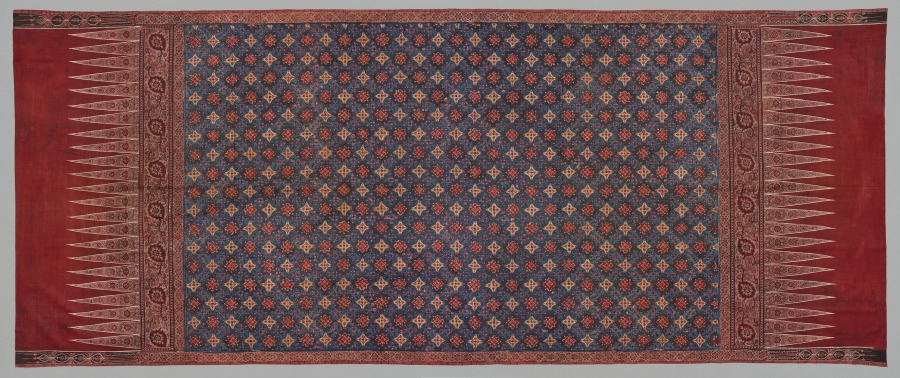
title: Hip Wrapper (tapis)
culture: India, Coromandel Coast, 1st half 19th Century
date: 1800–1850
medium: cotton; plain weave; block printed, drawn resist, painted mordants, dyed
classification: Textile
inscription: "16" embroidered in India